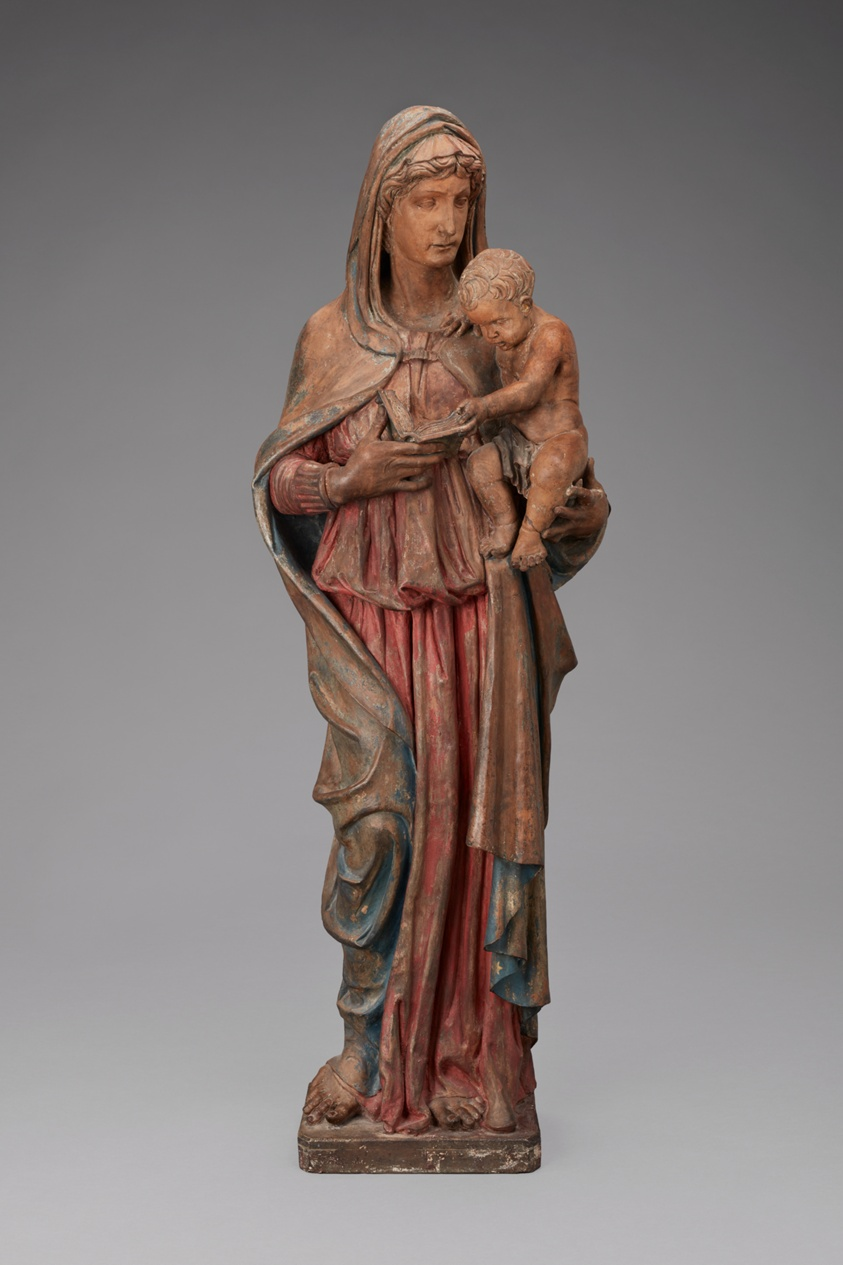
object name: Sculpture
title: Virgin and Child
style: sixteenth century, 16th Century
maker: Central Italian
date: c. 1500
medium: Pigmented terracotta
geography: Central Italy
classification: large scale; sculpture; Italian; terracotta (sculpture)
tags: Virgin and child/Madonna and child, Christianity, Christian subjects, religious figures, religious, religion, woman with children, woman, babies, child, mother and child, mother, Jesus, Virgin Mary